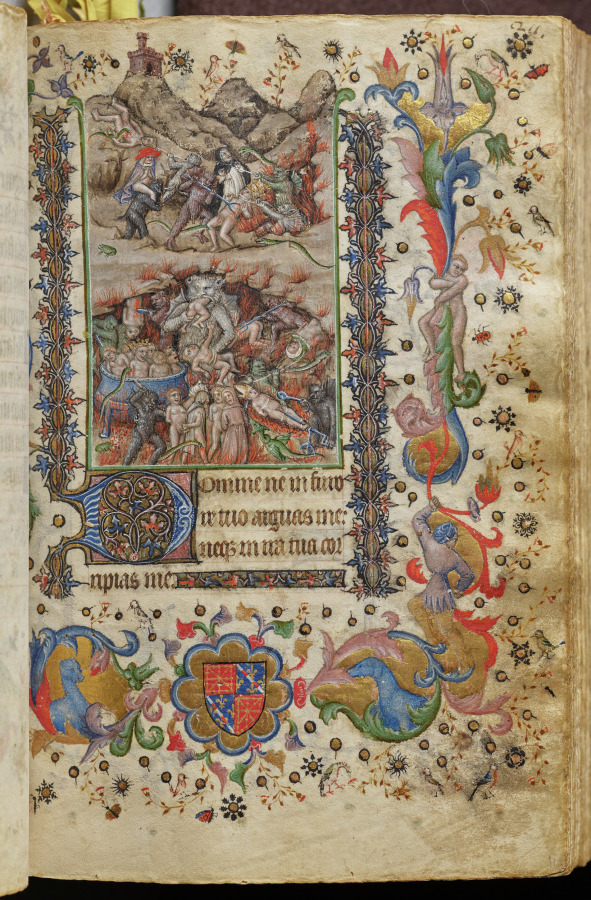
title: Hours of Charles the Noble, King of Navarre (1361-1425): fol. 106r, Last Judgment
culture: France, Paris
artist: Master of the Brussels Initials and Associates (French)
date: c. 1405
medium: ink, tempera, and gold on vellum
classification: Bound Volume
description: This precious volume was obviously highly prized by its owner, the French-born King of Navarre, who had his coat of arms painted on no less than twenty folios. Rather than directly commissioning this manuscript from a specific workshop, it seems that Charles the Noble acquired his book of hours -- perhaps ready-made for the luxury market -- while on a trip to Paris in 1404-05. A collaborative effort, six painting styles are evidenced within the pages of this codex, those of two Italians, two Frenchmen, and two Netherlanders. The painter who was responsible for the planning and decoration of the book, and who produced seventeen of the large miniatures, was a Bolognese artist known as the Master of the Brussels Initials. His principal assistant, responsible for most of the borders, was a Florentine who signed his name "Zecho" da Firenze on folio 208 verso.